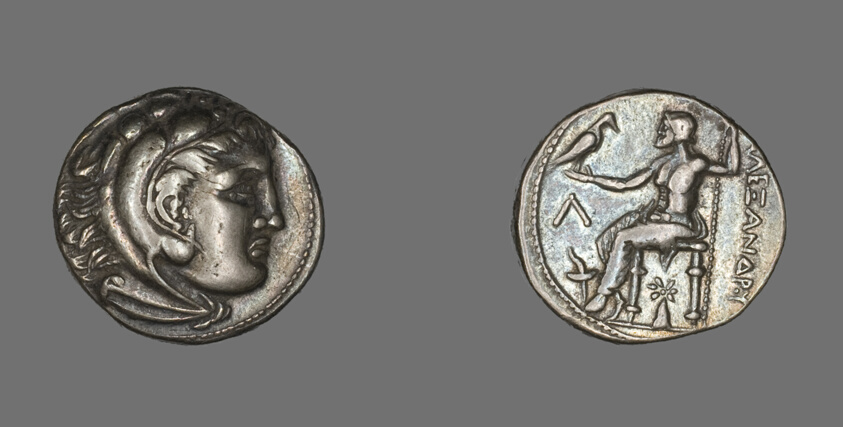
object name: Coin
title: Tetradrachm (Coin) Portraying Alexander the Great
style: hellenistic, greek, ancient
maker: Greek, minted in Amphipolis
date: 336-323 BCE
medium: Silver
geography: Roman Empire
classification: coin; ancient art